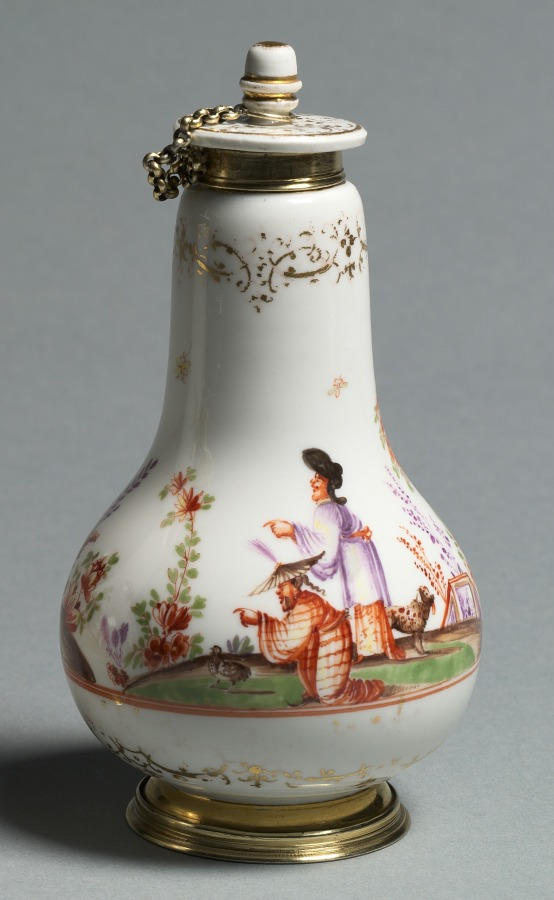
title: Covered Flask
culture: Germany, Meissen, 18th century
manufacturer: Meissen Porcelain Factory (German, est. c. 1710)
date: c. 1720–1723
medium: porcelain with gilt metal mounts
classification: Ceramic